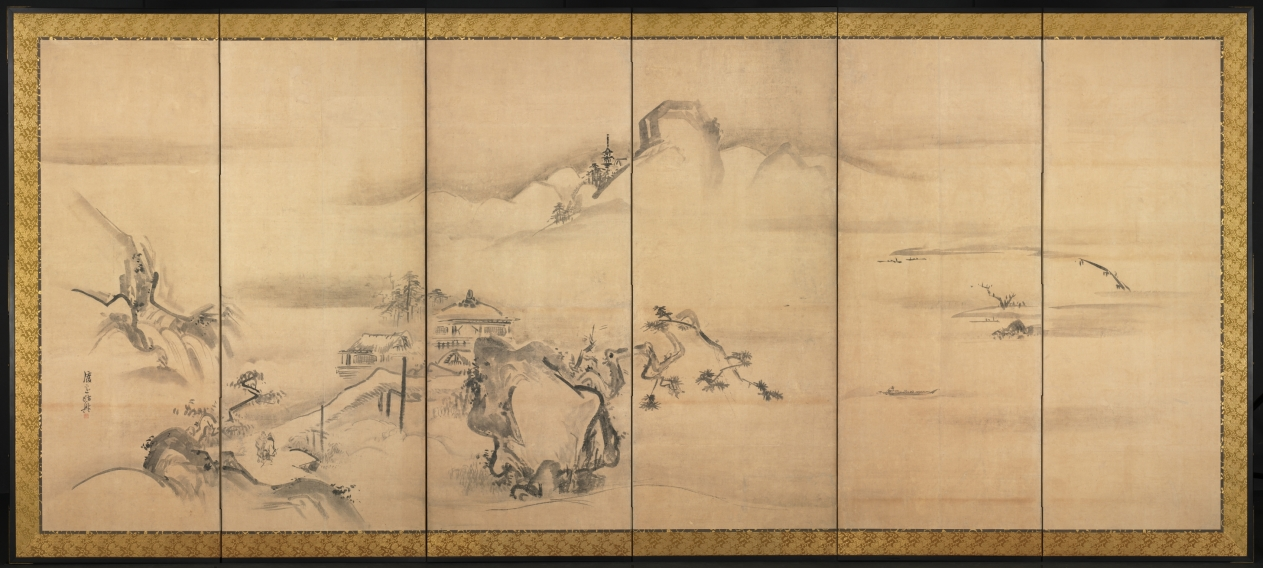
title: Eight Views of the Xiao and Xiang Rivers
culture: Japan, Edo period (1615–1868)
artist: Watanabe Shikō (Japanese, 1683–1755)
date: 1700s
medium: Six-panel folding screen; ink on paper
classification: Painting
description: Watanabe Shiko enjoyed a versatile and successful career, as well as a privileged upbringing, in Kyoto. His surviving work indicates a capacity to diligently study, master, and then interpret several painting techniques—each of which varies considerably in appearance. These byobu (folding screens), for instance, reflect training in the Kano school idiom that favored a monochromatic ink palette, vigorous brushwork, and traditional Chinese—rather than Japanese—subject matter. Shiko rendered this scenery in a particularly expansive manner, suggesting the vastness of China's topography relative to Japan's. Frequent visitors to the museum will recall that Shiko also painted the collection's favored pair of byobu, the Irises (CMA 1954.603).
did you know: This screen forms a pair with CMA 1968.267.